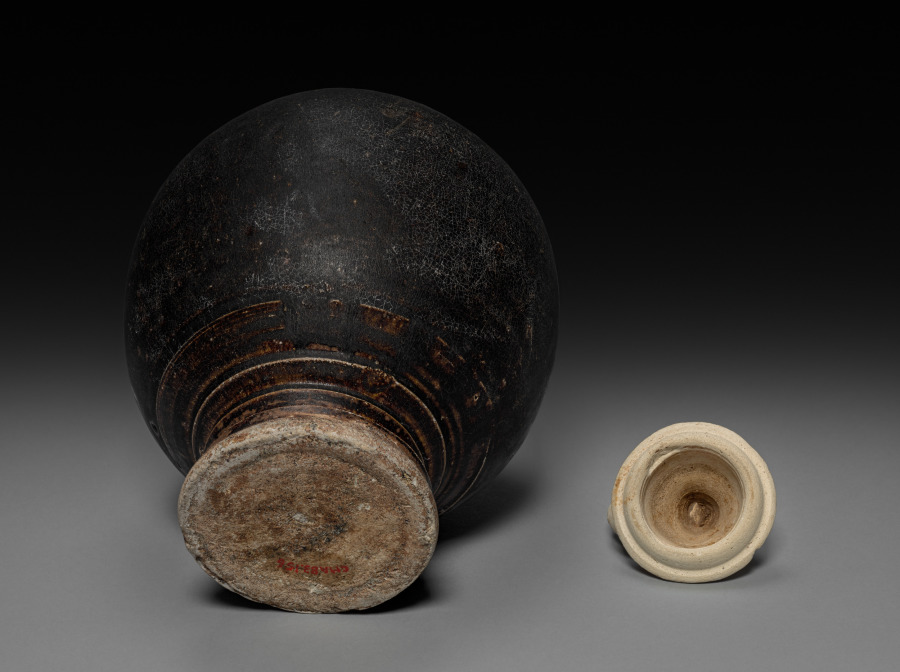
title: Jar in the Shape of a Fruit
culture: Cambodia, Northeast Thai kiln, Khmer Ware, Angkor Wat/Bayon period, 12th century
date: 1100s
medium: glazed pottery with brown slip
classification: Ceramic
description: This dark-brown glazed jar, with the heavy clay body and translucent glaze on the cover and the top just below it, has a rare shape of a fruit. It has a narrow foot with several moldings and incised wavy pattern immediately below the cover which is shaped in the form of a curling fruit stem that forms a handle. It is difficult to determine what type of fruit was meant, possibly a squash.